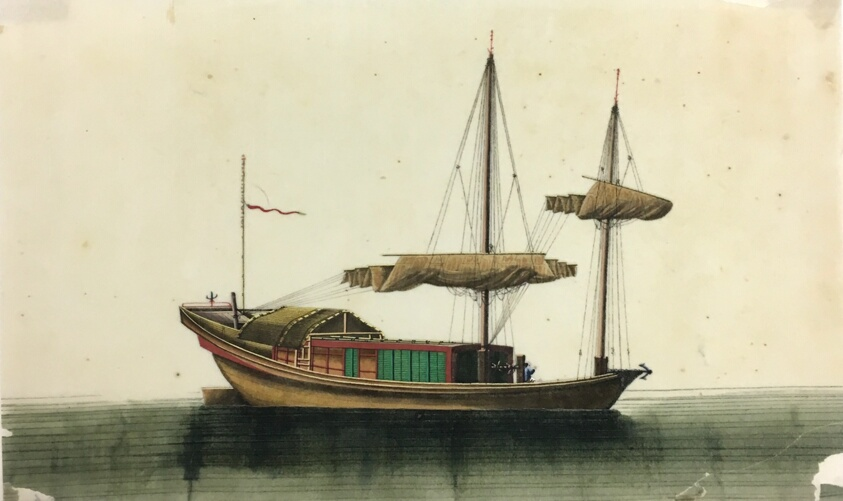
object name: Painting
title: Ship paintings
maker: China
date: mid 19th century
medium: Album of ten leaves; watercolor on paper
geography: Guangdong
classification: painting; asian art